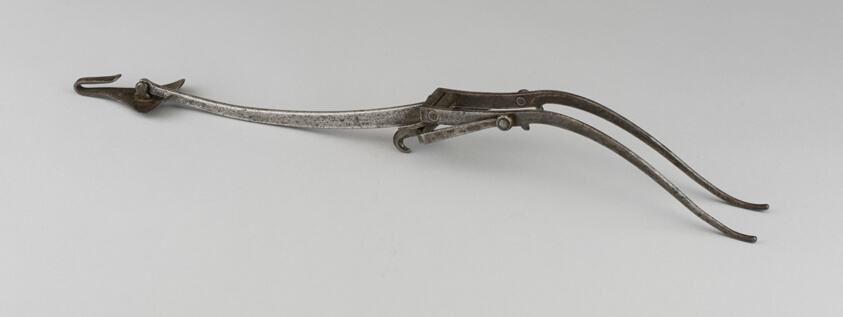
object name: Arms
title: Goat's Foot Lever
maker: Spanish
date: 1530/60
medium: Steel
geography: Europe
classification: crossbow; arms; arms and armor